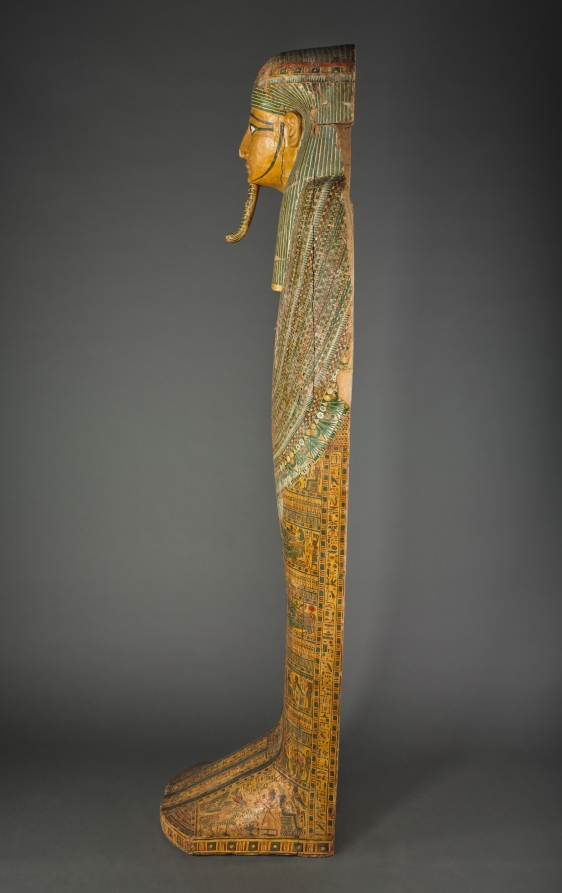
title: Coffin of Bakenmut (lid)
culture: Egypt, Thebes, Third Intermediate (1069–715 BCE), Dynasties 21–22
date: c. 1000–900 BCE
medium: gessoed and painted sycamore fig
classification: Funerary Equipment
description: The coffin of Bakenmut is one of the finest examples of painted wooden coffins made for the priests of Amen and their families at Thebes during Dynasty 21 and early Dynasty 22. The pharaohs of this time were no longer buried in the Valley of the Kings, but instead built tombs in the Delta, far to the north, where they resided. Security was lax in the Theban necropolis. The coffins and funerary goods of the wealthy citizens of Thebes were placed in unmarked and undecorated family tombs cut into the cliffs on the west bank of the Nile. All the care and detail that in more prosperous times were devoted to the decoration of the tomb chapel were now lavished on the elaborately painted coffins. Every available surface is crowded with religious scenes, images of funerary gods and goddesses, protective spells, and magical symbols. The deceased appears mummiform. An elaborate floral collar entirely covers the upper body, exposing only the separately attached hands (now lost). A pair of red "mummy braces" are crossed over the chest, their point of intersection marked by a winged sun disk. The lower body is covered with tiny figures modeled in gesso against a yellow background, which gives the effect of gold inlaid with glass or semiprecious stone. The decoration on the interior features two deified dead kings of Dynasty 18. Although these rulers had lived centuries before, memory of their greatness was still very much alive. The main scene near the top depicts Tuthmosis III, the great military pharaoh, who lived 500 years before Bakenmut. Posed as a mummy, the ruler wears a brilliant feathered garment enfolding him with falcon’s wings. The scene below features back-to-back seated images of Amenhotep I, regarded as the patron of the Theban cemetery and worshiped as a local god there.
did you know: Originally another smaller coffin was placed inside this outer coffin and in that the deceased with a mummy board would have rested.